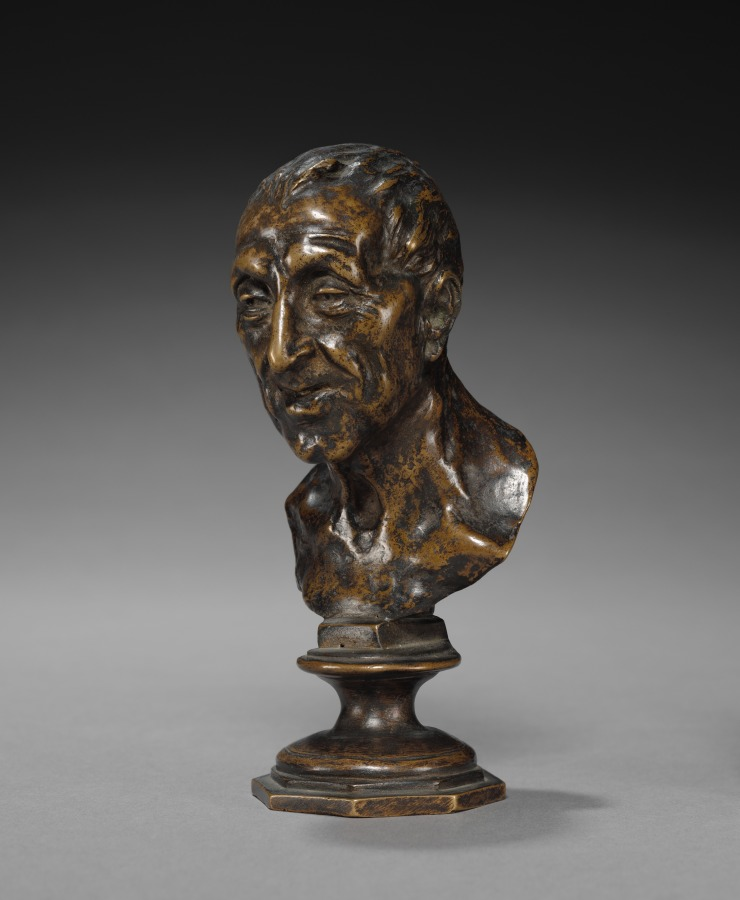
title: Head of a Man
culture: Italy, late 19th-early 20th century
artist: Vincenzo Gemito (Italian, 1852–1929)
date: c. 1875 – 1929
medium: bronze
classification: Sculpture